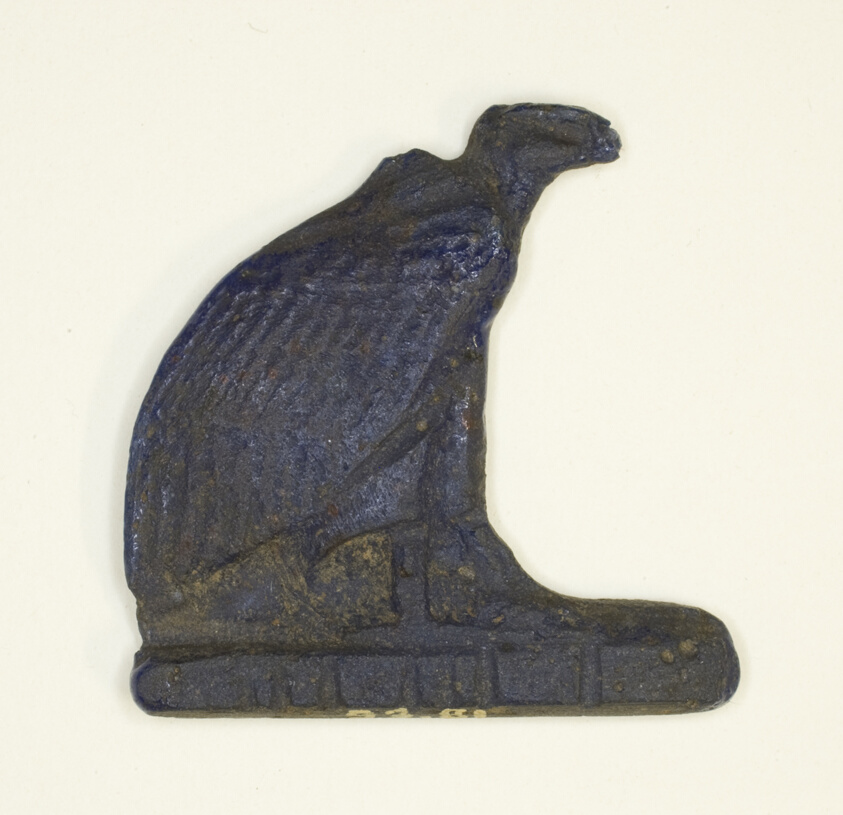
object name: Costume and Accessories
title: Amulet of a Vulture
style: twenty-fifth dynasty, third intermediate period, late period (egyptian)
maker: Egyptian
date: Late Period, Dynasty 25–30 (780–343 BCE)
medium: Glass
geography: Egypt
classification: amulet; jewelry; glass; ancient art; costume